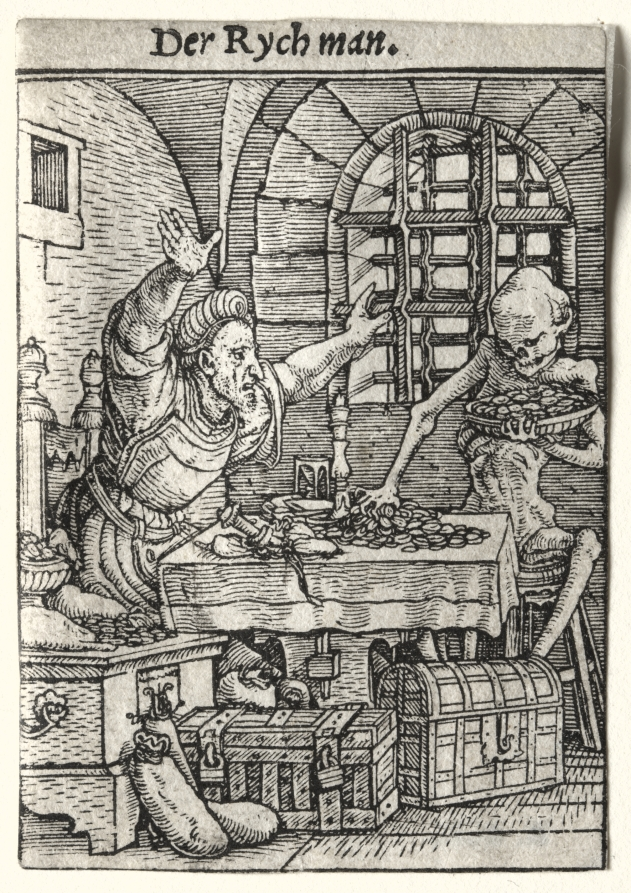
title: Dance of Death: The Miser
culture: Germany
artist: Hans Holbein the Younger (German, active England and Switzerland, 1497/98–1543)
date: c. 1526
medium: woodcut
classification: Print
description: Dance of Death is the most celebrated series of woodcuts designed by Holbein. The forty-one blocks were cut by Hans Lützelburger in the years immediately before his death in 1526, though the set was not published until 1538. Dance of Death originated as a drama in the middle of the 14th century. Following widespread epidemics such as the black plague, these plays took place in a cemetery or churchyard. Actors, dressed in pale costumes painted to resemble skeletons, personified Death and summoned a group of people from all social classes in a dancelike procession. In a period when the life span was short, the purpose of the Dance of Death was to remind the populace to prepare for the Last Judgement.